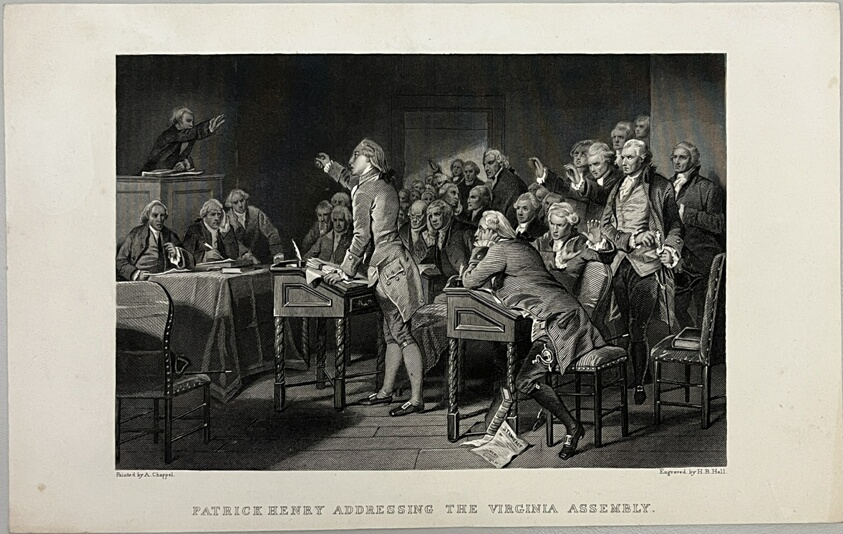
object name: Print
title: Patrick Henry Addressing the Virginia Assembly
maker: Henry Bryan Hall (American, 1808-1884); after Alonzo Chappel (American, 1828-1887)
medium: Steel engraving on paper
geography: United States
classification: reproduction; print; prints and drawing